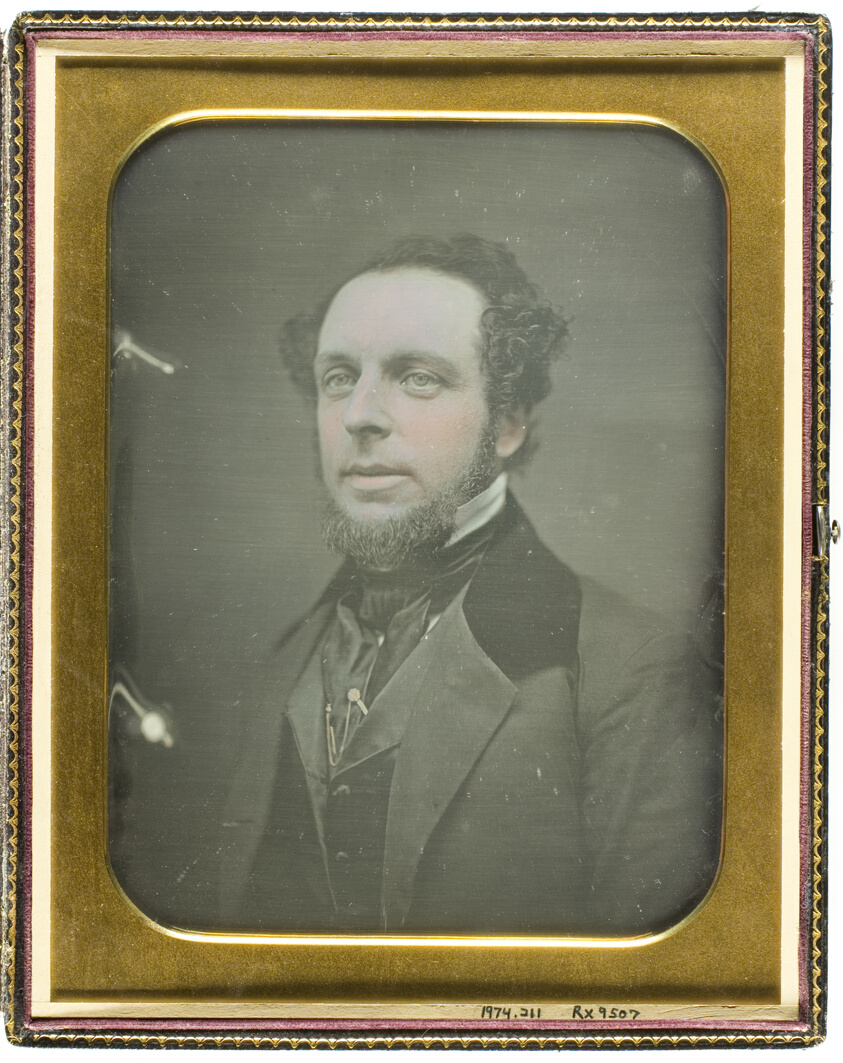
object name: Photograph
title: Untitled (Portrait of a Man)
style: 19th century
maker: Artist unknown; American, 19th century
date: c. 1839/60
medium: Daguerreotype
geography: United States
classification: daguerreotype; photographic process; photography; photograph